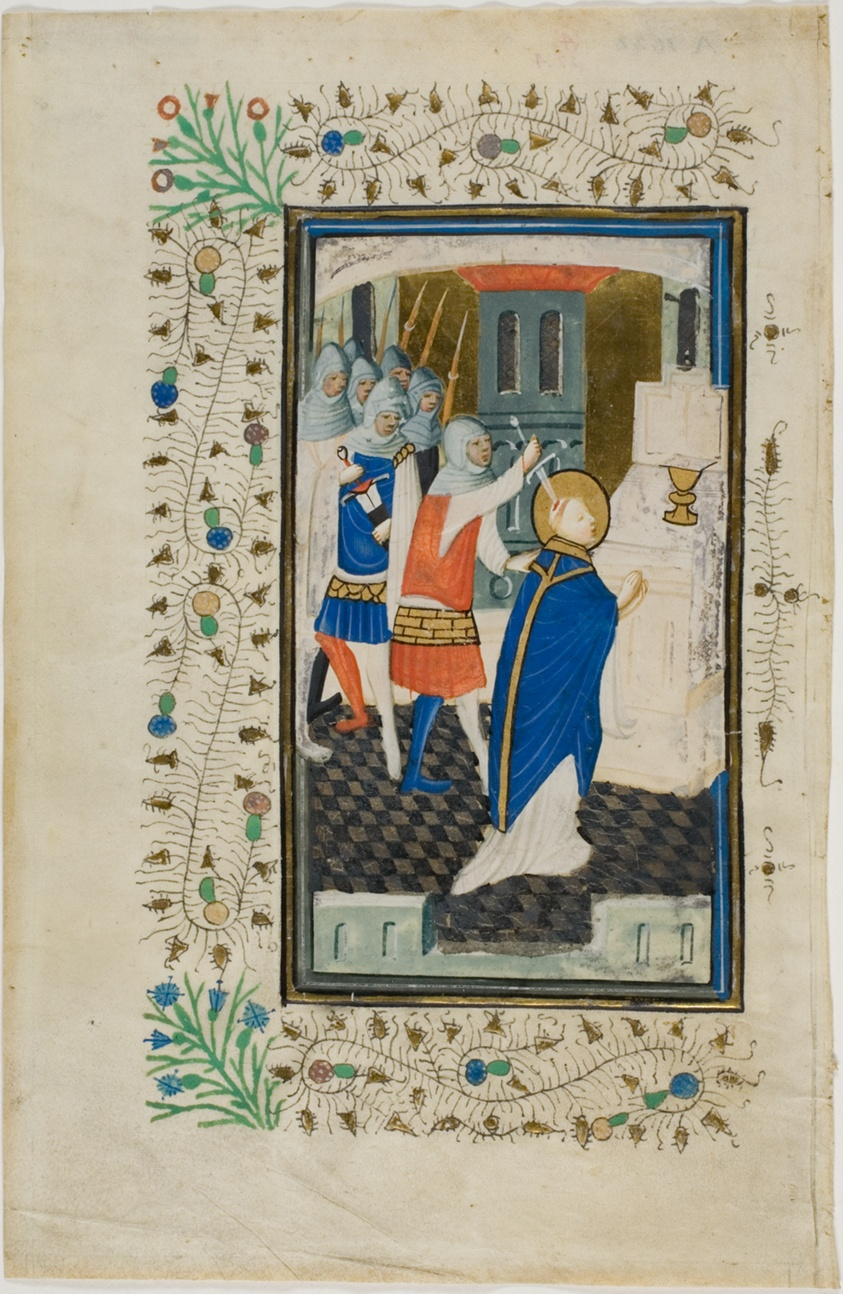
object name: Drawing and Watercolor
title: The Murder of Thomas Becket, page one, from a Book of Hours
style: medieval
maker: Flemish (Bruges); Nicolas Brouwer (Flemish, active c. 1420-c. 1450)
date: 1430/40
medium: Manuscript cutting with tempera and gold leaf, and pen and black ink, on parchment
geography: Flanders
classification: tempera; manuscript; drawings (visual works); prints and drawing